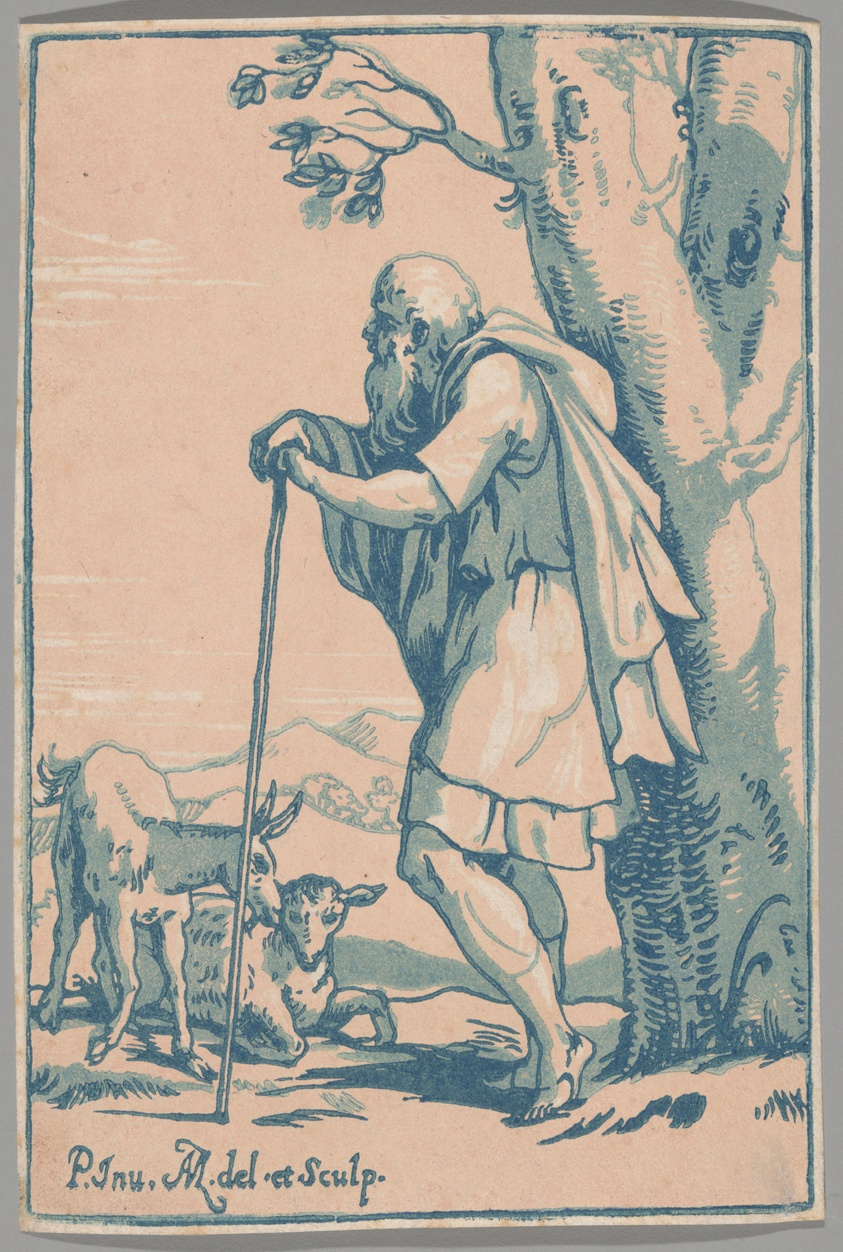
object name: Print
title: The Old Shepherd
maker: Anton Maria Zanetti; Italian, 1680–1767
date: 1722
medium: Chiaroscuro woodcut, from three blocks in pink, dark blue, and light blue, on cream laid paper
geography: Italy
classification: woodcut; print; prints and drawing